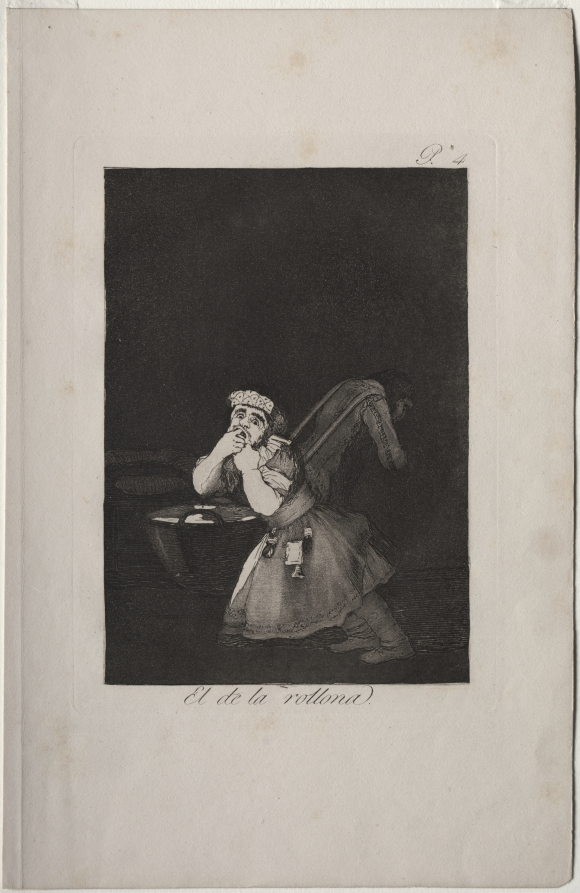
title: Nanny's Boy, Plate 4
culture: Spain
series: Los Caprichos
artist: Francisco de Goya (Spanish, 1746–1828)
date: 1799 (printed c.1855)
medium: etching and aquatint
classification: Print